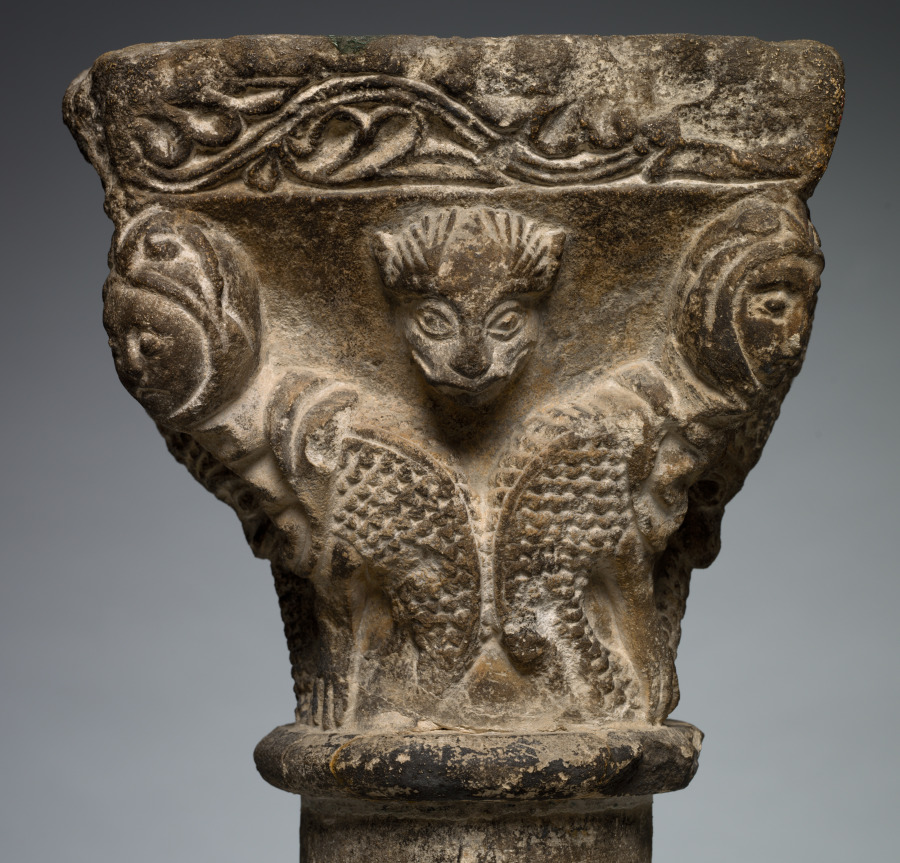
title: Capital with Addorsed Harpies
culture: Southwest France, Languedoc, Toulouse (?), 13th century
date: 1200s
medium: limestone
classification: Sculpture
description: Monstrous images were prevalent in the decoration of religious buildings during the Middle Ages. Such images must have impressed, perhaps even terrified, the monks and visitors who spent much of their time within the cloister or church, a place of prayer, contemplation, and reflection. Scholars have speculated how such images would have been received by the people given the ubiquity of monsters in medieval society. The carved monsters, often symbolizing vice and retribution for sin, were possibly designed to provoke a range of emotional responses including laughter, wonder, surprise, fear, and shock. This striking imagery must have had a strong impact, which in turn led Saint Bernard of Clairvaux (1090–1153), the spiritual head of the Cistercian order, to admonish their use as distracting from prayer.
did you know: A harpy is part bird and part woman featured often in Greek mythology.